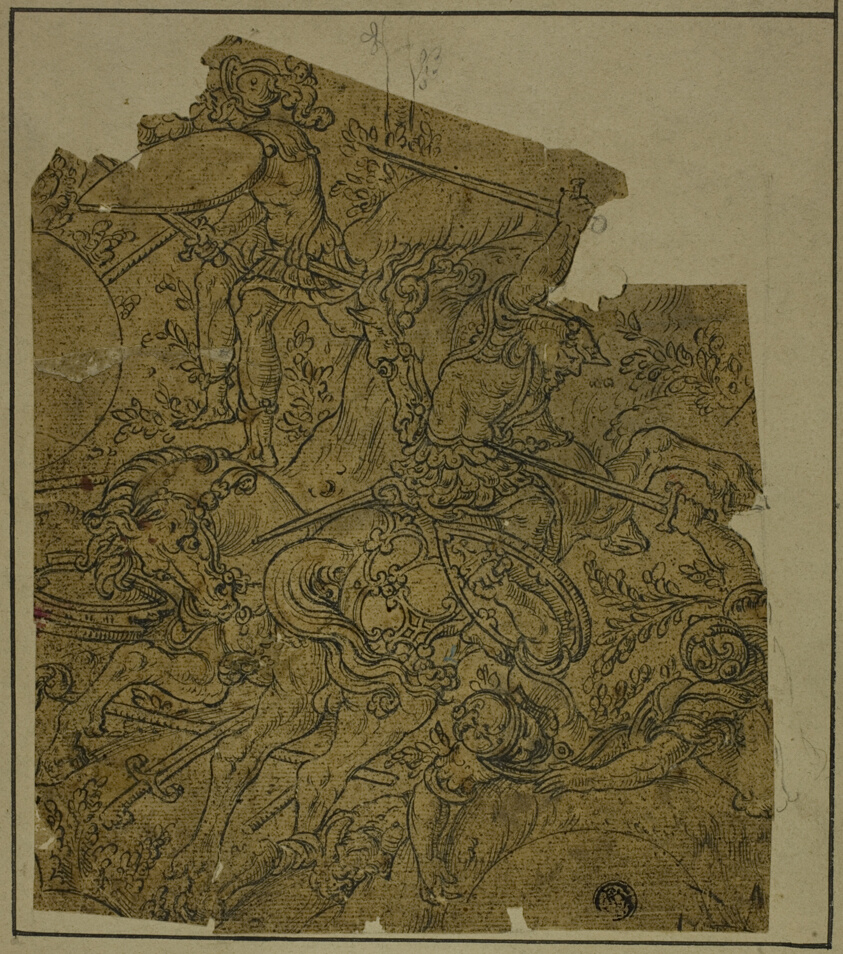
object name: Drawing and Watercolor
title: Fragment: Armed Warriors on Horseback Fighting Foot Soldiers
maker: Unknown Artist; Flemish, German or Italian, n.d.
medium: Pen and black ink, on brown laid paper, laid down on board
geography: Flanders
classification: pen and ink drawings; drawings (visual works); prints and drawing